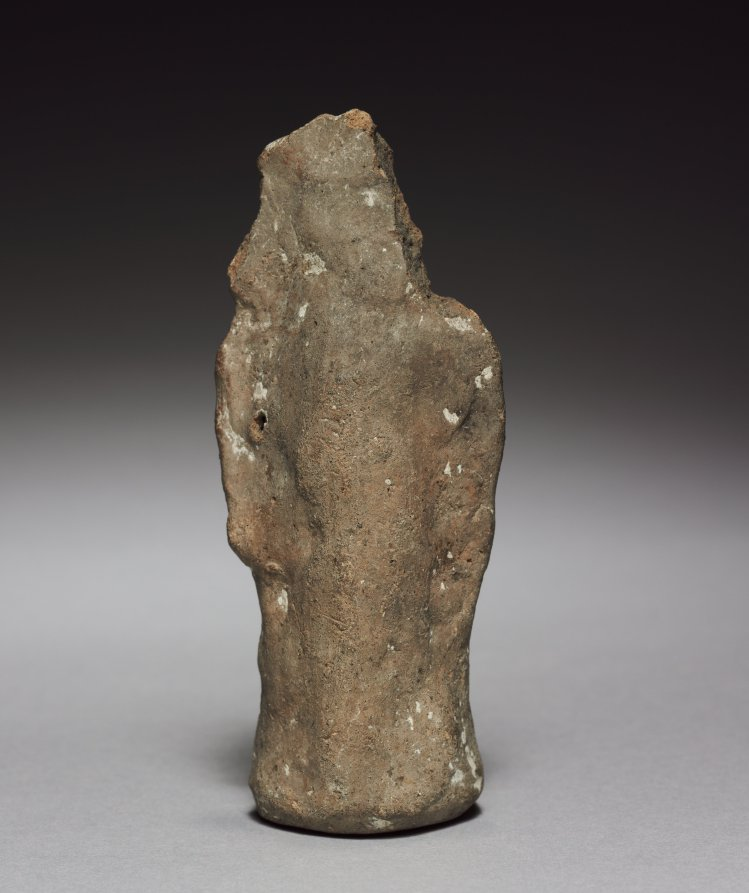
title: Figurine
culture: Mexico, Aztec, 14th century-16th century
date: 1325–1521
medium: terracotta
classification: Ceramic